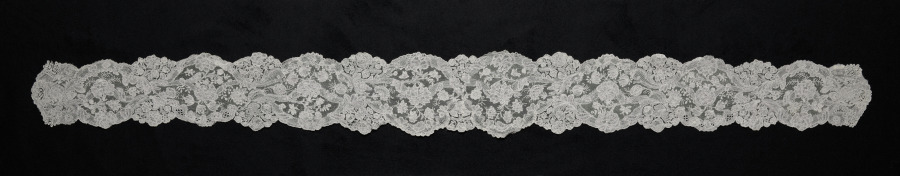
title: Lace Lappet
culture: Belgium, Brussels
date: 1700s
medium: Linen: bobbin lace (Point d'Angleterre)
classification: Lace